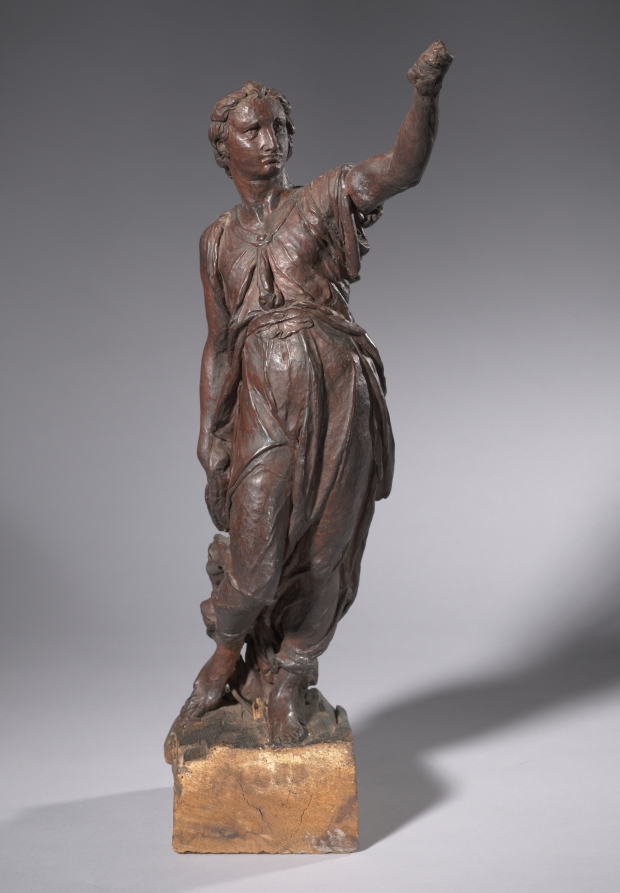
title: Model for an Angel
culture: Italy, Milan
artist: Annibale Fontana (Italian, 1540–1587)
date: c. 1583–84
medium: wax on a metal armature, mounted on wood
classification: Sculpture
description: Annibale Fontana created this wax model, perhaps in part for the patron’s approval, while preparing a sculpture for the Church of Santa Maria presso San Celso in Milan. The angel was mounted high on the facade, so the composition needed to be impeccably balanced as well as legible from the ground. Wings and a trumpet appear in the final work, but Fontana here concentrates on the deep folds, clinging drapery, and forceful pose.